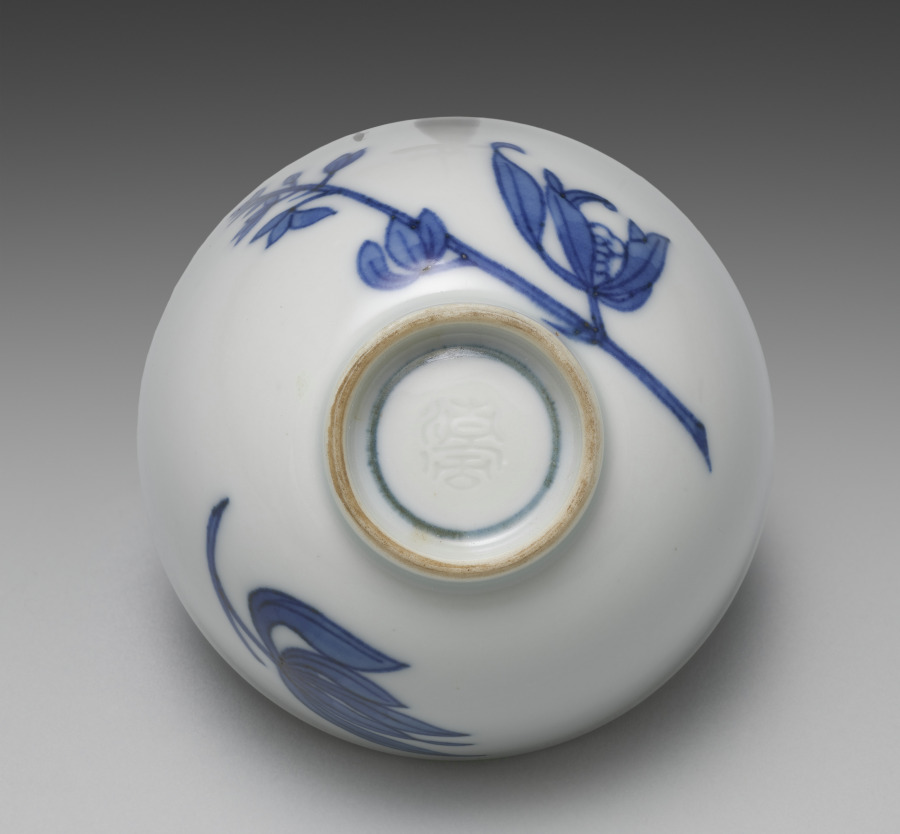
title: Teacup from Tea Set with Orchids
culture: Japan, Meiji period (1868–1912)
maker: Seifū Yohei III (Japanese, 1851–1914)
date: c. 1893–1914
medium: Porcelain with underglaze blue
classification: Ceramic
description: Although the teapot here is stored in a separate box from the five cups, these six pieces may once have been part of a tea set that included other tools such as a water cooler. The teacups have orchid flowers on both sides in underglaze blue, as well as a blue band inside the footring. The teapot has the same design and a blue band painted around the bottom of the lid’s knob. The cups’ long wood storage box is stamped on the exterior, over the lid and base, with a small red seal reading “Satō.” The same seal appears on five small squares of yellow textile, one placed in the bottom of each compartment in the teacup storage box. These are additional to the customary yellow cloths stamped with a “Seifu” seal. Interestingly, four of the Seifū cloths are stamped with an ovoid seal, while the remaining cloth, which is a slightly lighter color, has an unusual seal that is not quite gourd-shaped and with the fū of Seifū in a stylized, unrecognizable form. The teapot has its own box with a Satō seal and is wrapped with an orange textile stamped with the same unusual Seifū seal. A set with a very similar surface design is in the Brooklyn Museum. The Brooklyn set has a water cooler and a small pitcher, in addition to the teapot and cups, and all are in a single storage box. This box records the tea tools as made with kanpakuji, or “bright-jewel white porcelain,” counted among Yohei III’s most important inventions, and carved images. In fact, both sets have a white surface much closer in coloration to the cool white of porcelain clay used in Kyoto at the time, and the designs are simply painted. The Brooklyn set was thus likely mismatched at some point with a box intended for another tea set. Nonetheless, the box may have helped prevent the set’s original components from being dispersed, and the set itself provides insight into how the other tools from the present set may have looked.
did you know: This tea set with orchids has a side-handled pot called a kyūsu, used for steeping, straining, and serving tea.